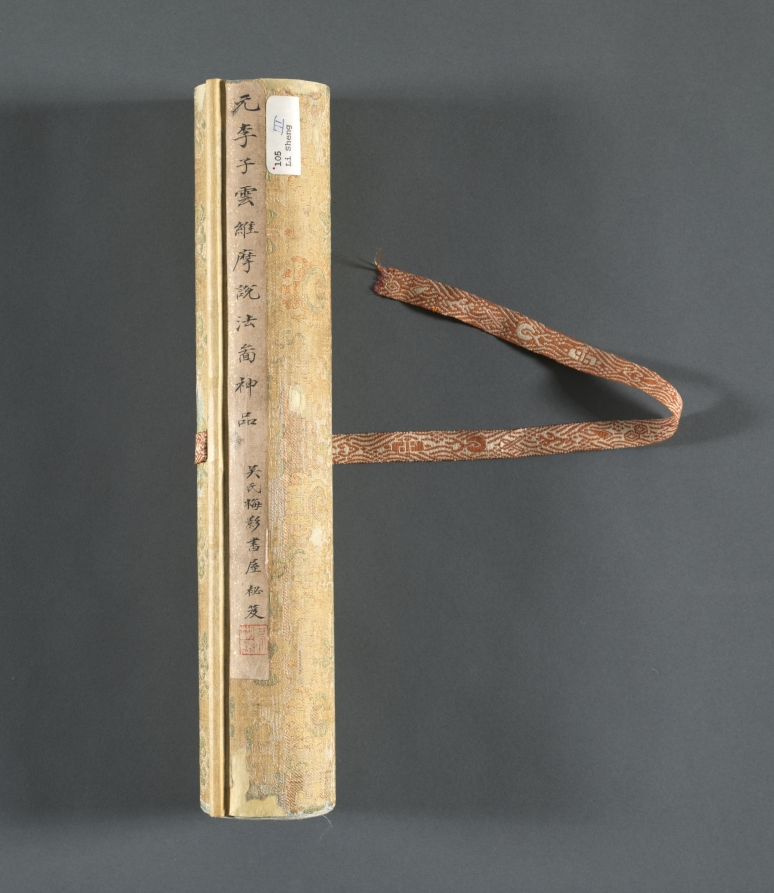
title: Buddha's Conversion of Five Bhiksu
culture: China, Yuan dynasty (1271–1368)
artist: Li Sheng (Chinese, active c. 1324–after 1375)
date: mid-1300s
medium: handscroll; ink on paper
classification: Painting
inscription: 紫篔生李升識 [印] 李氏子雲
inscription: 4 colophons and 12 additional seals: The "Heart" Sutra (Maha Prajnaparamita) text written by Wu Yuqing 吳餘慶 (active early 1400s); 2 seals of Xu Qianxue 徐乾學 (1631–1694); 3 colophons, one dated 1929 and two dated 1936, and 9 seals of Wu Hufan 吳湖帆 (1894–1968); 1 colophon, dated 1932, of Chen Dingshan; 1 seal unidentified.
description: This episode stems from the life of the historical Buddha, who, after his enlightenment, was initially hesitant about preaching his own doctrine. After much personal deliberation and prodding by deities, he finally relented. The first converts were the five guards who served him when he was still a prince. For Li Sheng, this is the pretext of the painting, which moves from the interaction of the bhiksu with the Buddha to a broader awareness of the vast surroundings of the scene.